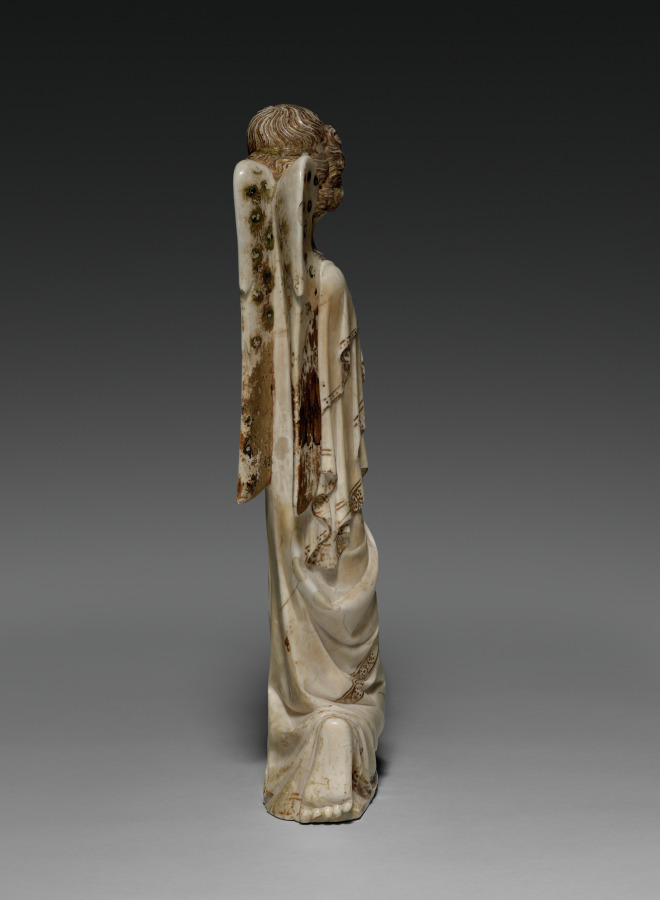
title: The Archangel Gabriel from an Annunciation Group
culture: France, Champagne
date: c. 1350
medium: alabaster with traces of paint and gilding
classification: Sculpture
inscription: Ave Maria, Gratia Plena.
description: In France, the use of alabaster began in the late 1200s for funerary monuments. The Archangel Gabriel, together with its counterpart, the Virgin Mary (now in the Louvre Museum, Paris) is part of an Annunciation. This is a rare example of alabaster sculpture from the 1300s. The alabaster comes from a quarry near Malaucène in Provence (France), making it an instance of long-distance trade of the rare material. Although the figure is very flat, it was likely made to also be viewed from the back, where there are remnants of gilding and the peacock feathers of the angel’s wing.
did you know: The surface of alabaster works can vary. By differentiating the intensity of polishing, it is possible for sculptures to create a surface with varying degrees of luster, or shine.